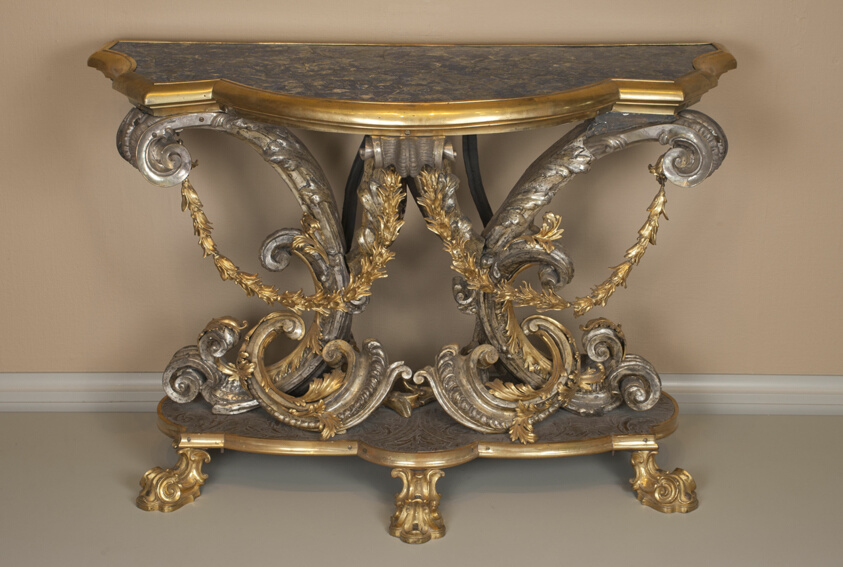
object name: Furniture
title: Console Table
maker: Italy, Rome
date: c. 1740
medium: Gilded bronze, lapis lazuli, chased and silvered copper, unidentified soft wood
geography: Rome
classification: table; furniture; european decorative arts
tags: furniture